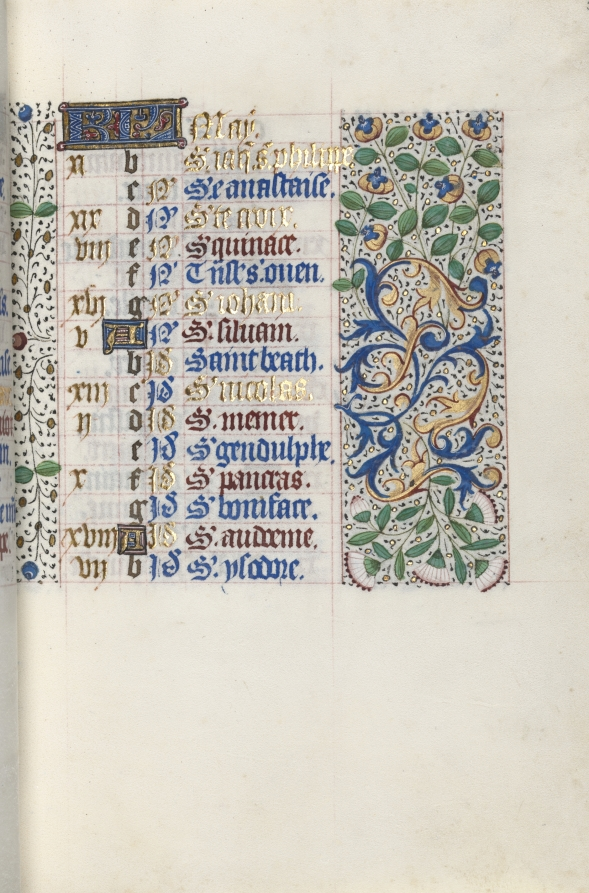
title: Book of Hours (Use of Rouen): fol. 5r, Calendar Page for May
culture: France, Rouen, 15th century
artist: Master of the Geneva Latini (French, active Rouen, 1460–80)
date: c. 1470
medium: ink, tempera, and gold on vellum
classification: Bound Volume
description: In the late 1400s and early 1500s Rouen was an established and important center of book production. The city’s cathedral had a wealthy chapter that spent large sums of money to commission books and to maintain its extensive library. The stationers and booksellers would have likely been concentrated in or near the cathedral precinct. This artist, named after a manuscript now in Geneva, was Rouen’s principal illuminator during the second half of the 1400s.